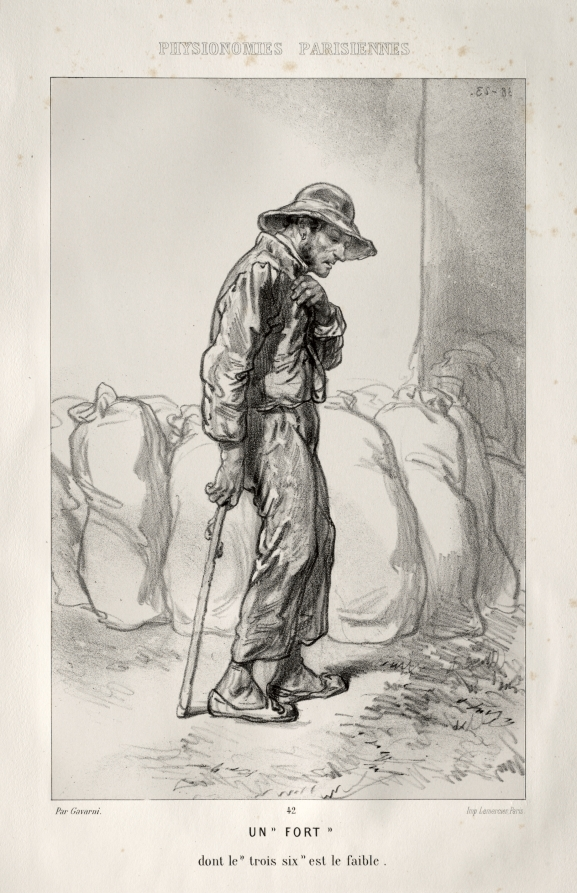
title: Un Fort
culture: France, 19th century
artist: Paul Gavarni (French, 1804–1866)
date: c. 1858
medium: lithograph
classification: Print